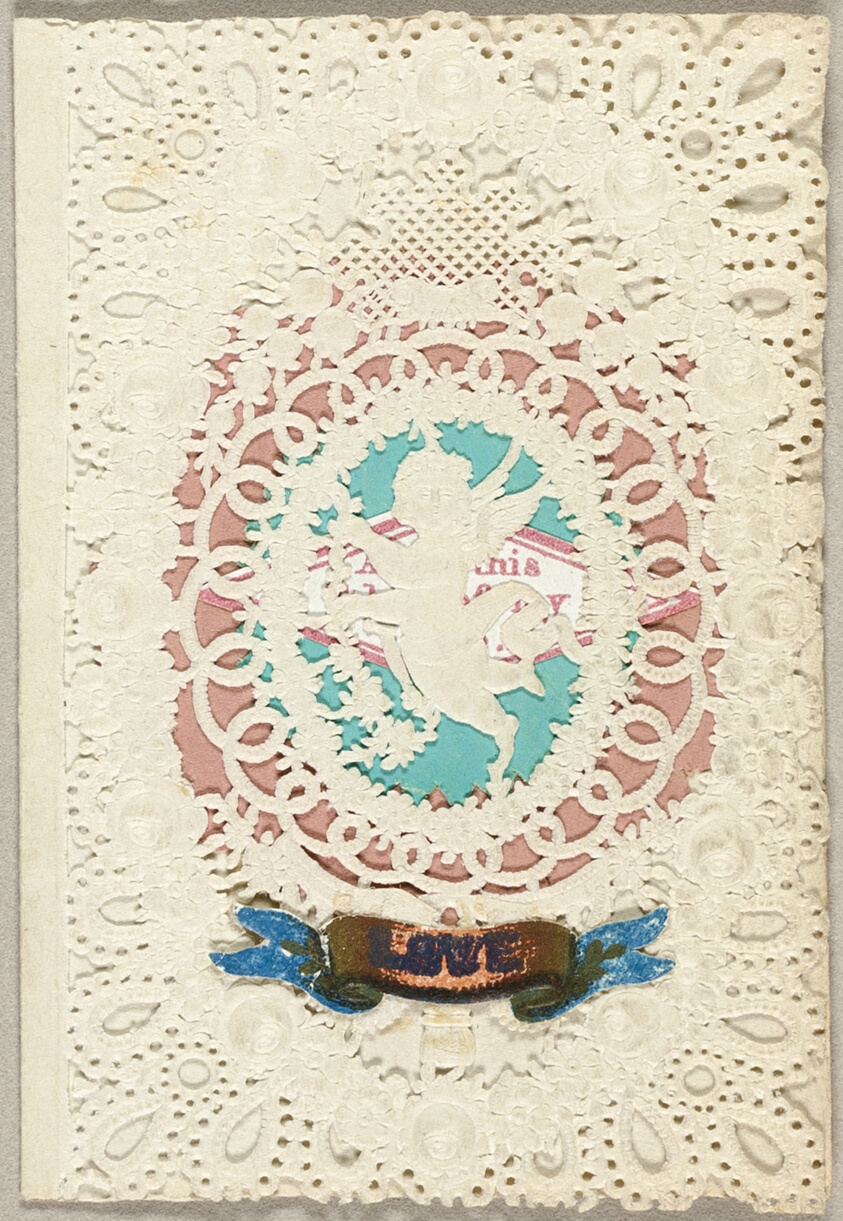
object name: Drawing and Watercolor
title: Love (Valentine)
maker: G. Ingram (English, 19th century)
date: c. 1850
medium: Collaged elements on cut and embossed (designed) ivory wove paper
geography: England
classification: collage; valentine; prints and drawing; paper